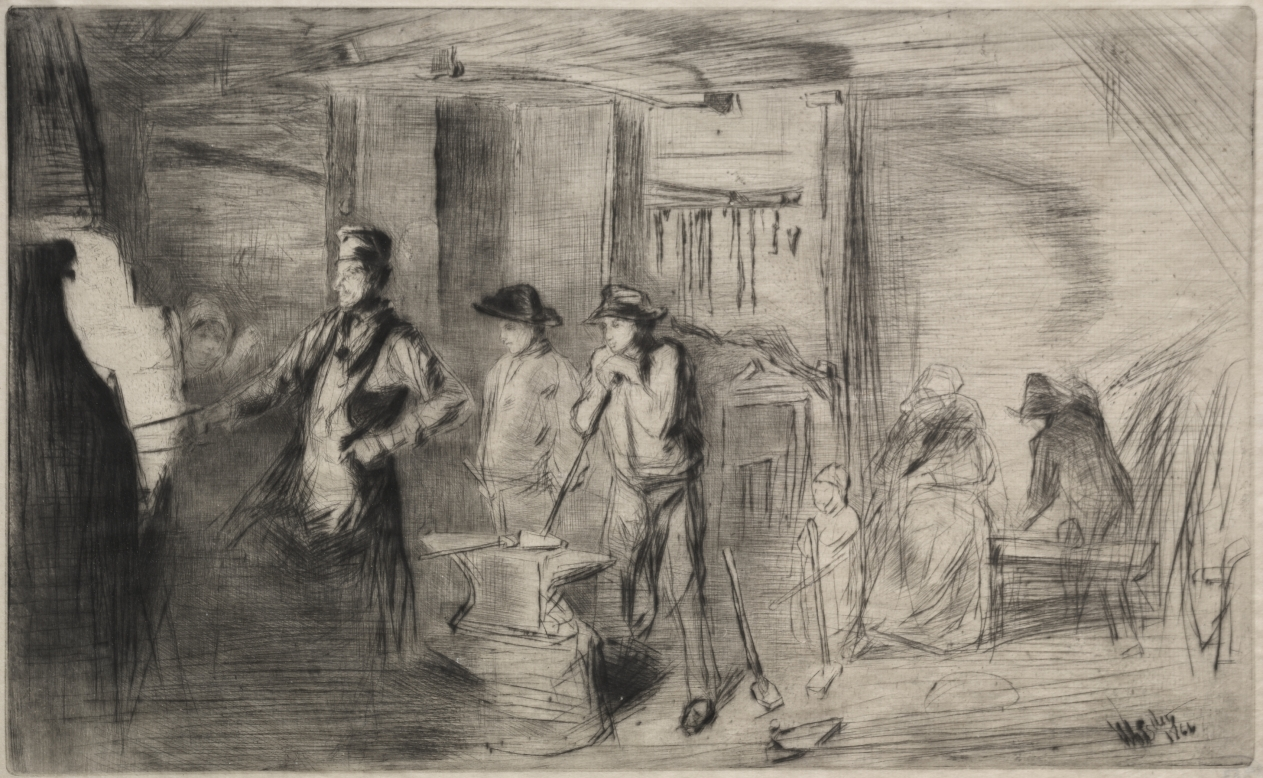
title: The Forge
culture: America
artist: James McNeill Whistler (American, 1834–1903)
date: 1866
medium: drypoint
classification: Print